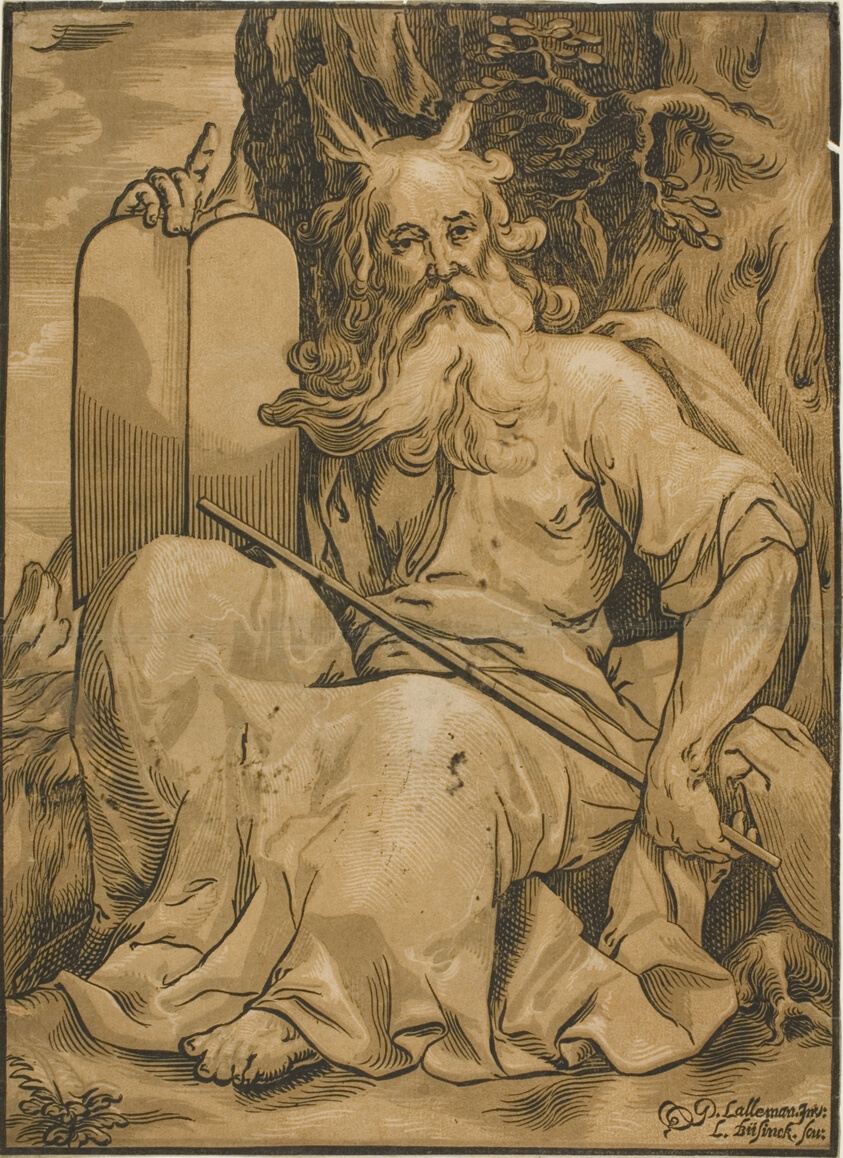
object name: Print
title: Moses with the Tables of the Law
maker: Ludolph Büsinck (German, 1585-1648); after G.L'Allemand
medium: Chiaroscuro woodcut from three blocks on paper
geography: Germany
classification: woodcut; print; prints and drawing